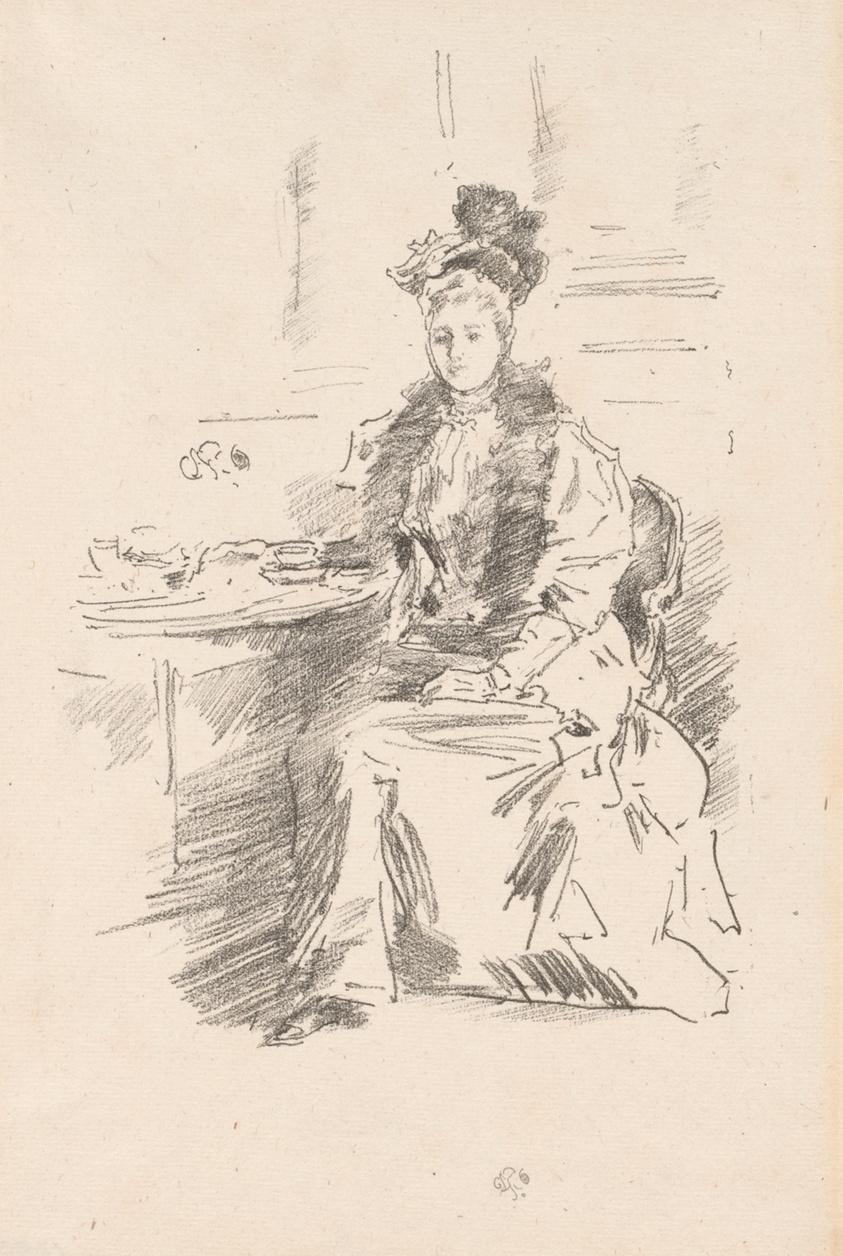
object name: Print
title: La Jolie New Yorkaise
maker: James McNeill Whistler (American, 1834-1903)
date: 1894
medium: Transfer lithograph in black on ivory laid paper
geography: United States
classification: transfer lithograph; lithograph; print; prints and drawing; paper